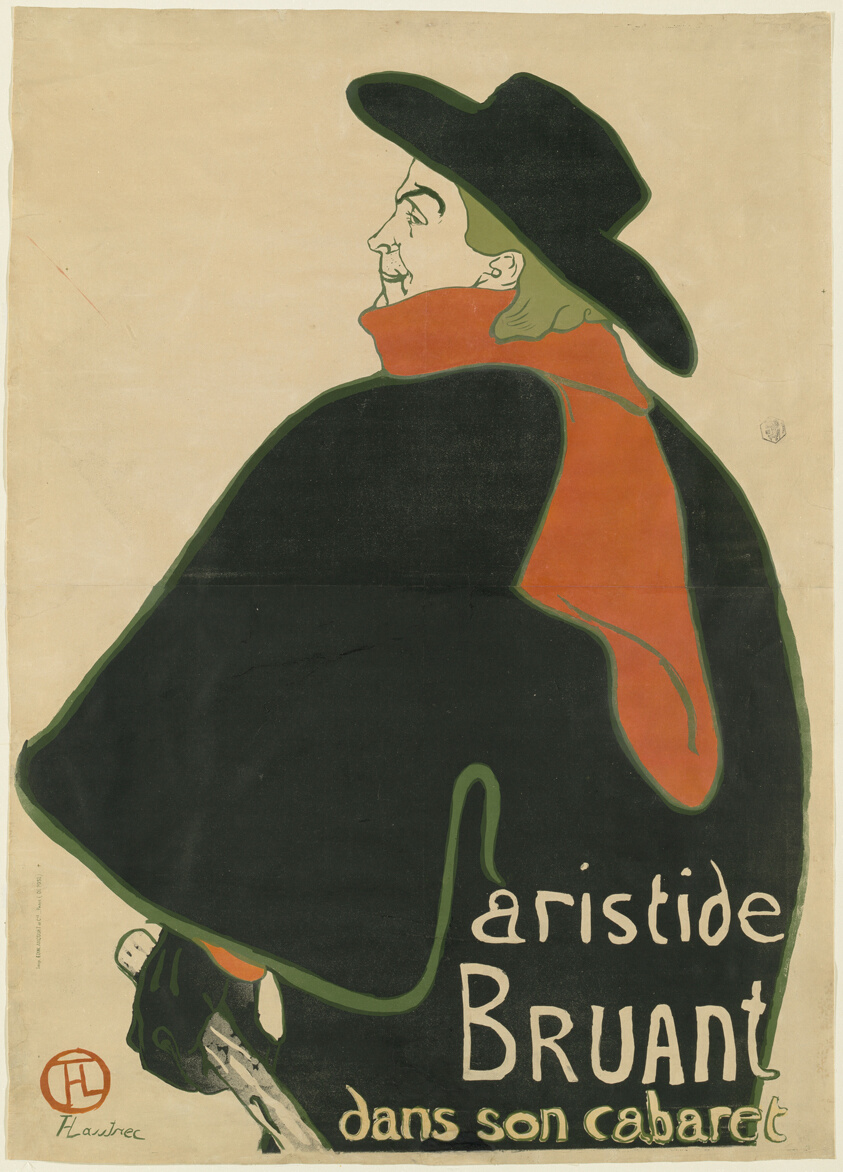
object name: Print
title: Aristide Bruant, in His Cabaret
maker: Henri de Toulouse-Lautrec (French, 1864-1901)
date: 1893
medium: Color lithograph on buff wove paper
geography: France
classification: lithograph; poster; print; prints and drawing